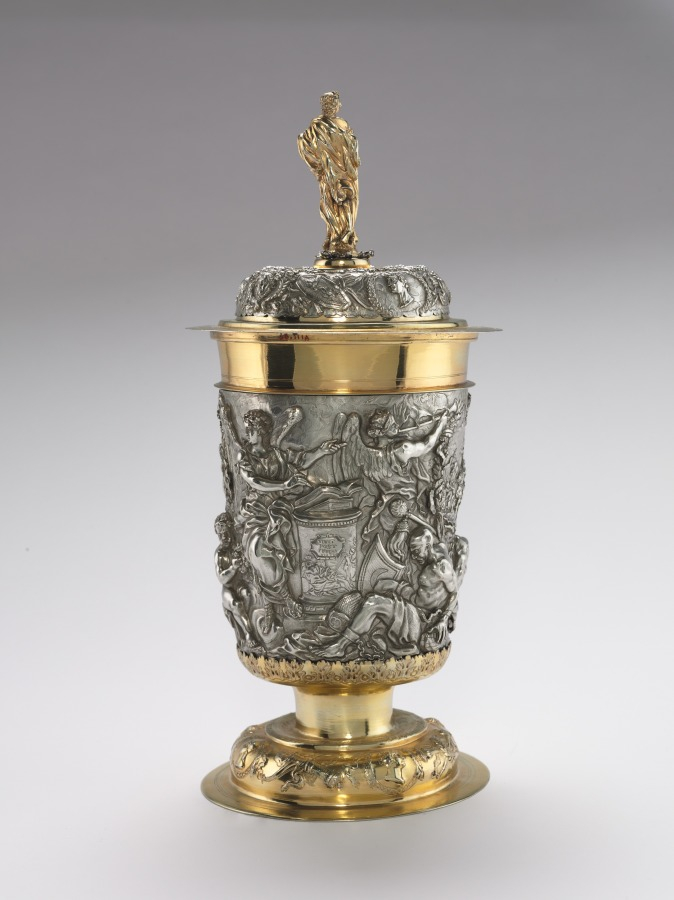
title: Covered Cup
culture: Germany, Augsburg, 17th century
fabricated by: Johann Andreas Thelot (German, 1655–1734)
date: 1688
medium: silver and gilt silver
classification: Metalwork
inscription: incised: J. A. Thélot. 1688.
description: Thelot was one of the most important silversmiths active in Germany in the late 1600s and early 1700s. The decorations of this cup refer to the defeat of the Turks in Central Europe in the 1680s.